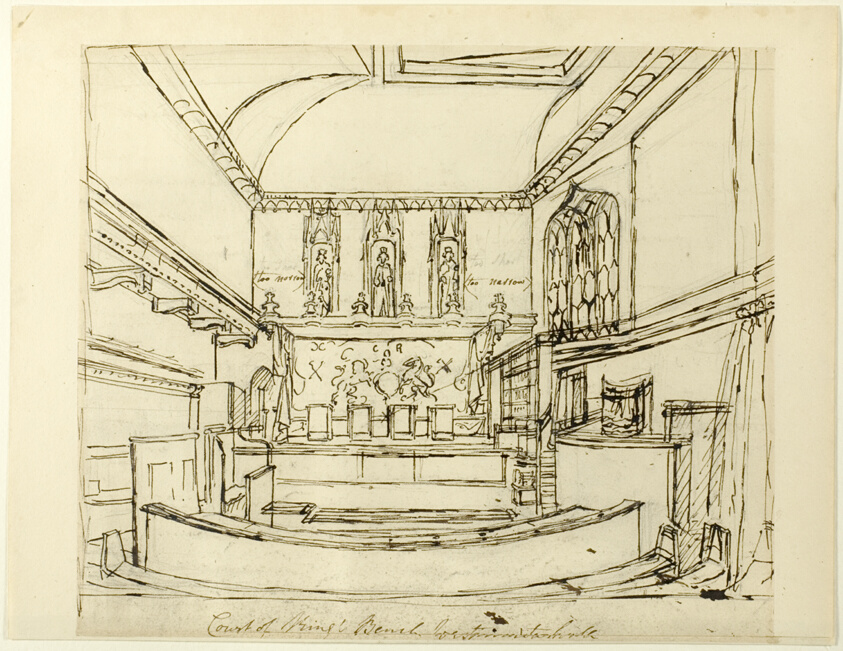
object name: Drawing and Watercolor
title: Study for Court of King's Bench, Westminster Hall, from Microcosm of London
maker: Augustus Charles Pugin (English, born France, 1762-1832)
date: c. 1808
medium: Pen and brown ink over graphite, on tan wove paper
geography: England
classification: pen and ink drawings; graphite; drawings (visual works); prints and drawing